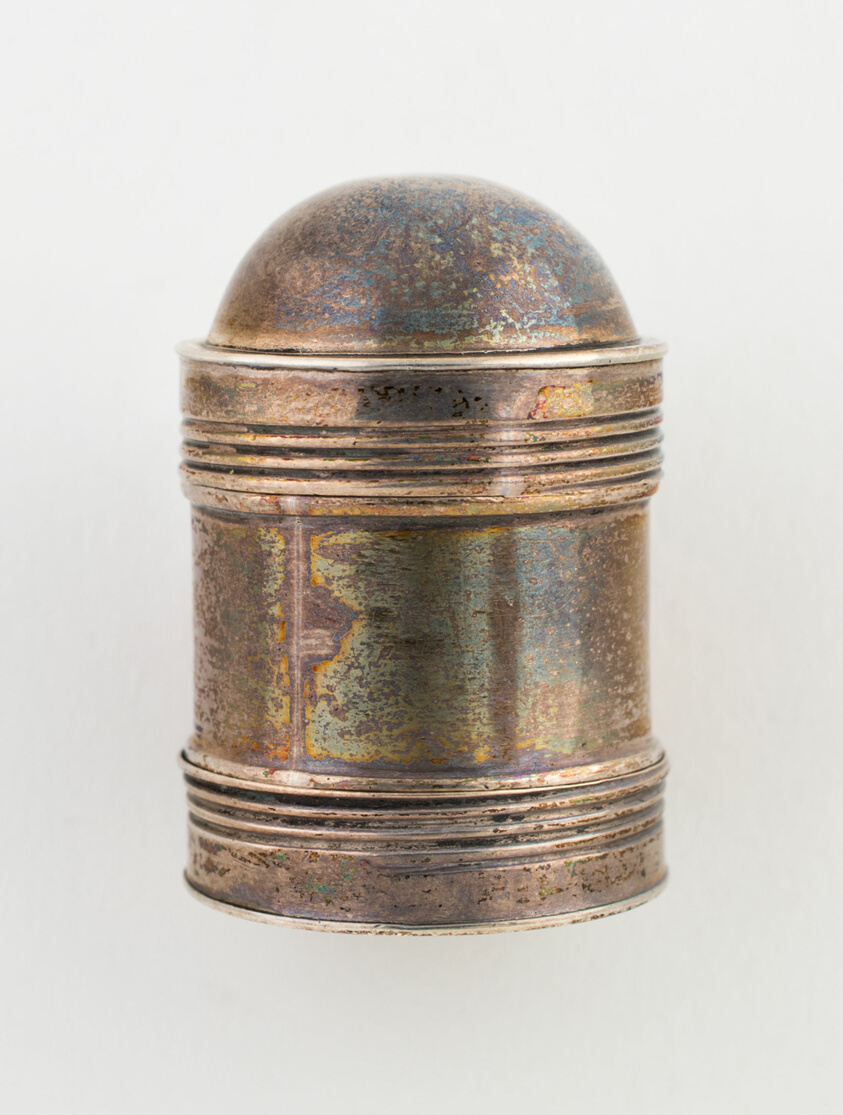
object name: Metalwork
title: Nutmeg Grater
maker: Joseph Taylor; Birmingham, England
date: c. 1794/95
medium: Silver and iron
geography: Birmingham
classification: container for personal use; box; european decorative arts; metalwork; silver; decorative object/ornament